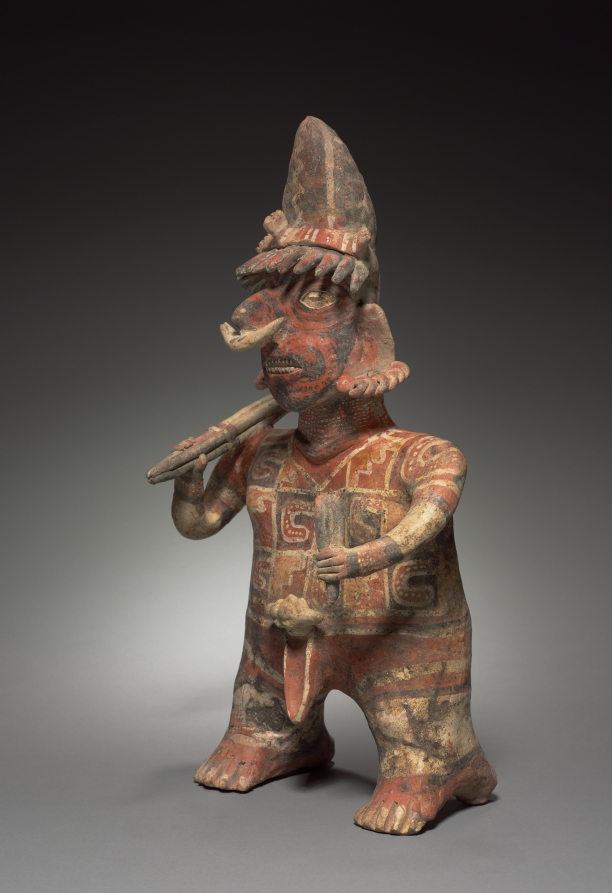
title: Standing Male Figure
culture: Mexico, Nayarit, Ixtlan del Rio Style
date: c. 100 BCE–300 CE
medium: earthenware with colored slips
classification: Sculpture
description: Like his female companion, this male figure is portrayed in all his finery. He carries spears, indicating that he is a hunter or warrior, and his confident grin conveys aggression and vitality.